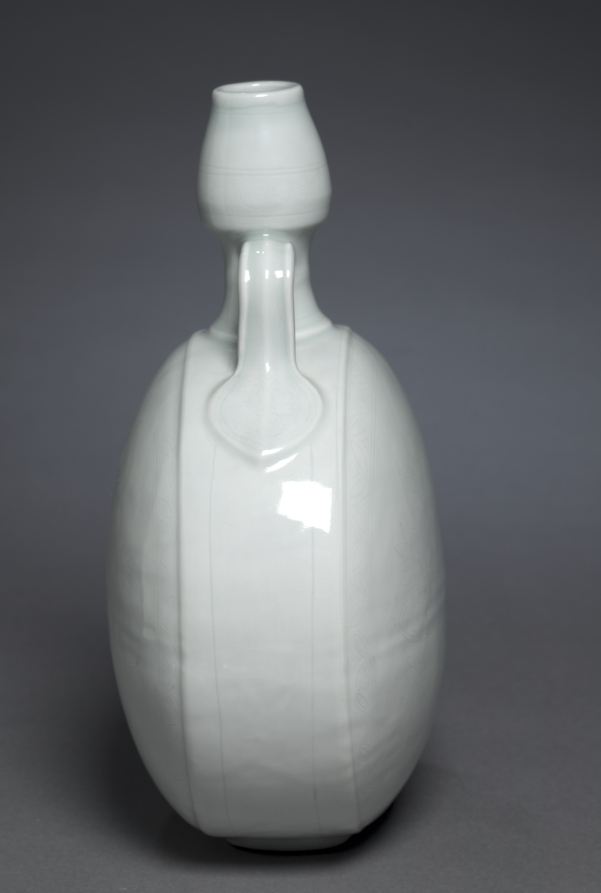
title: Gourd Flask with Floral Medallion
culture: China, Jiangxi province, Jingdezhen, Ming dynasty (1368-1644), Yongle period (1403-24)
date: 1403–24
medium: porcelain with incised decoration and white glaze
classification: Ceramic